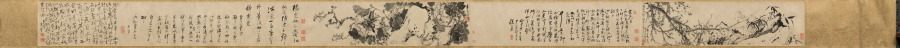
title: Plum Blossoms and Peonies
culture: China, Qing dynasty (1644-1911)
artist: Gao Fenghan (Chinese, 1683–1749)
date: 1741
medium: handscroll, ink on paper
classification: Painting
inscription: Artist's 2 inscriptions and 9 seals (the painting of Peonies with the artist's colophon and the colophon by Hou Chia-fan are on a single sheet of paper). Artist's inscription and 2 seals (Plum Blossoms): [seal] Ts'ai-yün. After finishing writing my colophon, I unrolled the painting to take another look, and it now seems that the composition here should have moved to the later part of the scroll. If that is the case, then the "Cool Beauty" [prunus] of the Solitary Hill is after all unable to take precedence over the "King of Flowers" [peony]. A laugh. Lao-fou inscribed. [seal] Feng-han. Artist's colophon (Plum Blossoms): [3 seals] Tun; Yen-yün-kung-yang, Hou-shang-tso-sheng. A few days after I painted this scroll for Shui- hsien [Yüeh Meng-yüan], the plum blossoms were in full bloom at his residence. He invited me over to enjoy them together for a long while, and I composed two additional poems and wrote them down here for his criticism. [Poems on the colophon are not translated.] First month, twenty-first day, your junior, Kao Feng-han of Nan-fou drafted this with the left hand. [seal] Feng-han. Artist's inscription and 4 seals (Peonies): Brushed with the left hand in the hsin-yu year [1741]. [seal] Yu-hsi. [3 seals at end of painting] Hou-shang-tso-sheng; Yen-yün-kung-yang; Shih-tsao-wu. Artist's colophon and seal (Peonies): The imperial concubine from the Yang family loved to dress in red, And from the emperor won the title of Hai-t'ang. But ever since she became the new dream of the moon palace, She changed into rainbow colors, while learning to dance. After I wrote the poem on Looking for Plum Blossoms in the Teng-wei Mountains, I attached to it a few branches of prunus, some bamboo tips and a piece of rock, with a scattering of green [moss] here and there to fill up the scroll. Unexpectedly, my playful fascination [with these subjects] was still not quite satisfied, so I made up these amorous ideas and romantic images [of the peony], to follow the footsteps of the fair lady of the Ku-hsieh Mountain [prunus]. Furthermore, I picked out one poem to be my vanguard. Perhaps such luminosity of wealth and power will be enough to overwhelm the poor fellows, and [they] will not mind the comparatively short length [of paper] assigned to it. Amusingly inscribed. Please correct me again. To Shui-hsien, my learned senior, your junior Han inscribed again. [seal] Tso-hua [left-handed painting]. 1 additional colophon and 5 additional seals: 1 colophon, dated 1742, and 3 seals of Hou Chia-fan (act. ca. 1742); 1 seal of P'u Ch'üan (20th c.?); 1 seal of Li family (dates unknown).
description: One of the so-called Yangzhou Eccentrics (a group of painters who lived in Yangzhou and were known for their unorthodox art and lifestyle), Gao Fenghan depicts China’s two most loved flowers in full bloom—the “cold beauty,” or plum blossom, in the first section, and the “king of flowers,” or peony, in the second section. Painted in 1741, the year when Gao decided to leave the south and return home to Shandong province in eastern China, this work was likely a token of farewell. His casual brushwork may indicate his mental and physical struggle at the time. After having crippled his right hand in 1737, Gao used his left hand to paint and achieved a crudeness and eccentric style unattainable before.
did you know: In East Asian art, peonies traditionally symbolize prosperity and wealth.